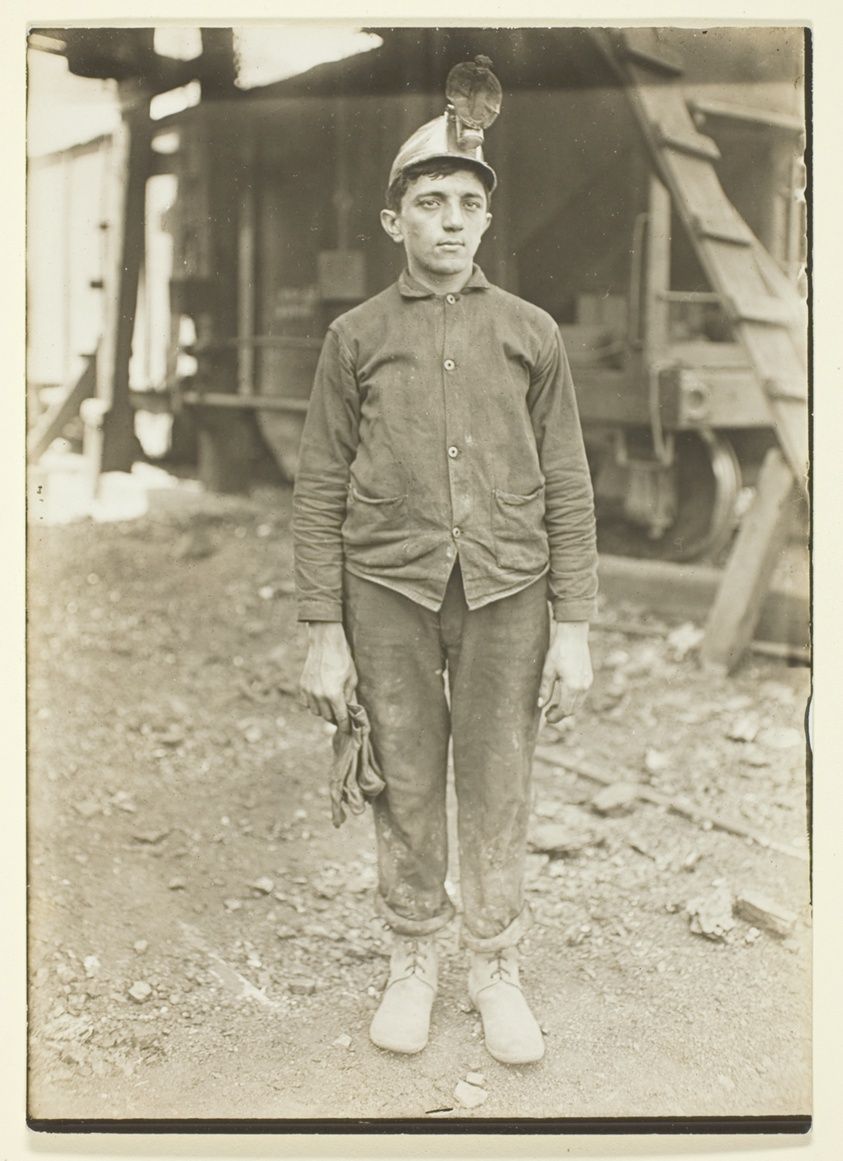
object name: Photograph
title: Driver in Pennsylvania Coal Mine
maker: Lewis Wickes Hine (American, 1874–1940)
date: 1909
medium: Gelatin silver print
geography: United States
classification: gelatin silver (developing-out-paper) pr; photographic process; photography; photograph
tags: Collected by Hugh Edwards